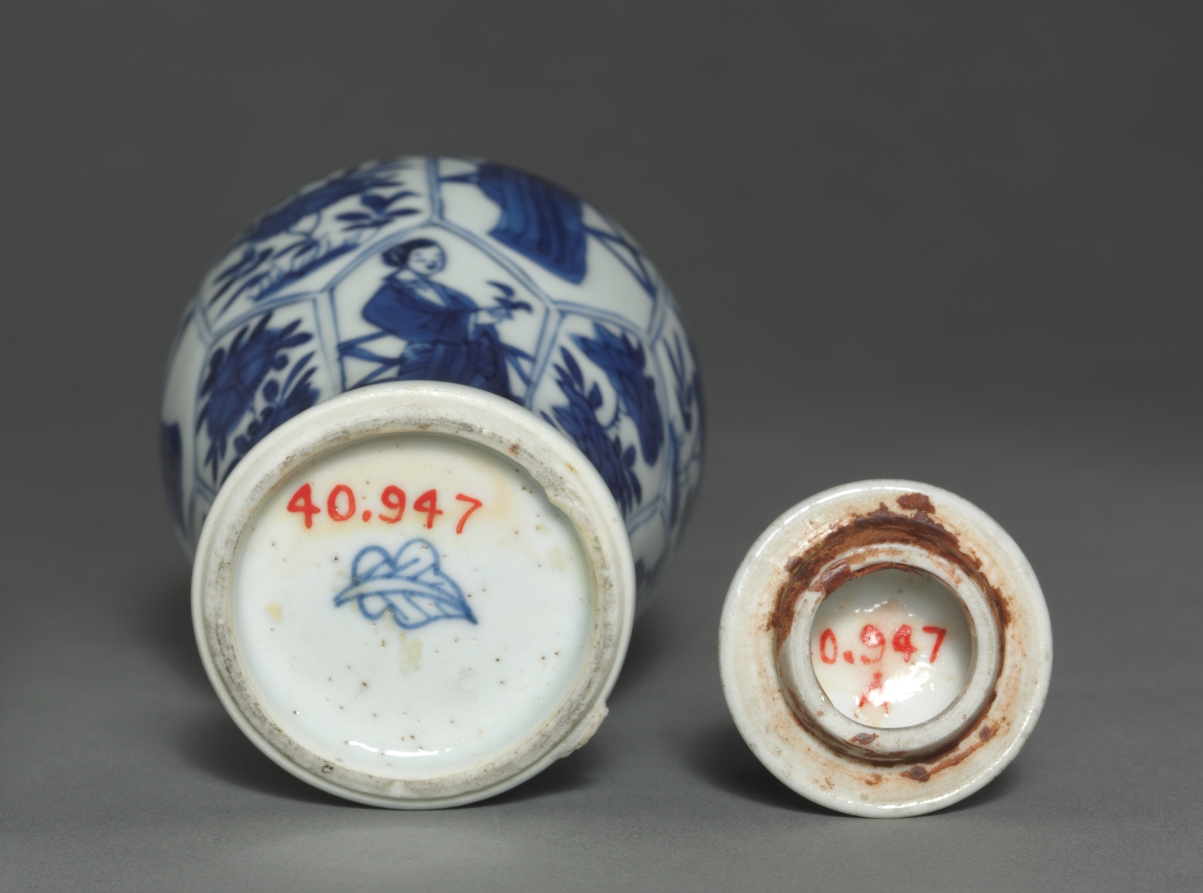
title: Jar with Cover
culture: China, Qing dynasty (1644-1911)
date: 19th Century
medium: porcelain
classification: Ceramic